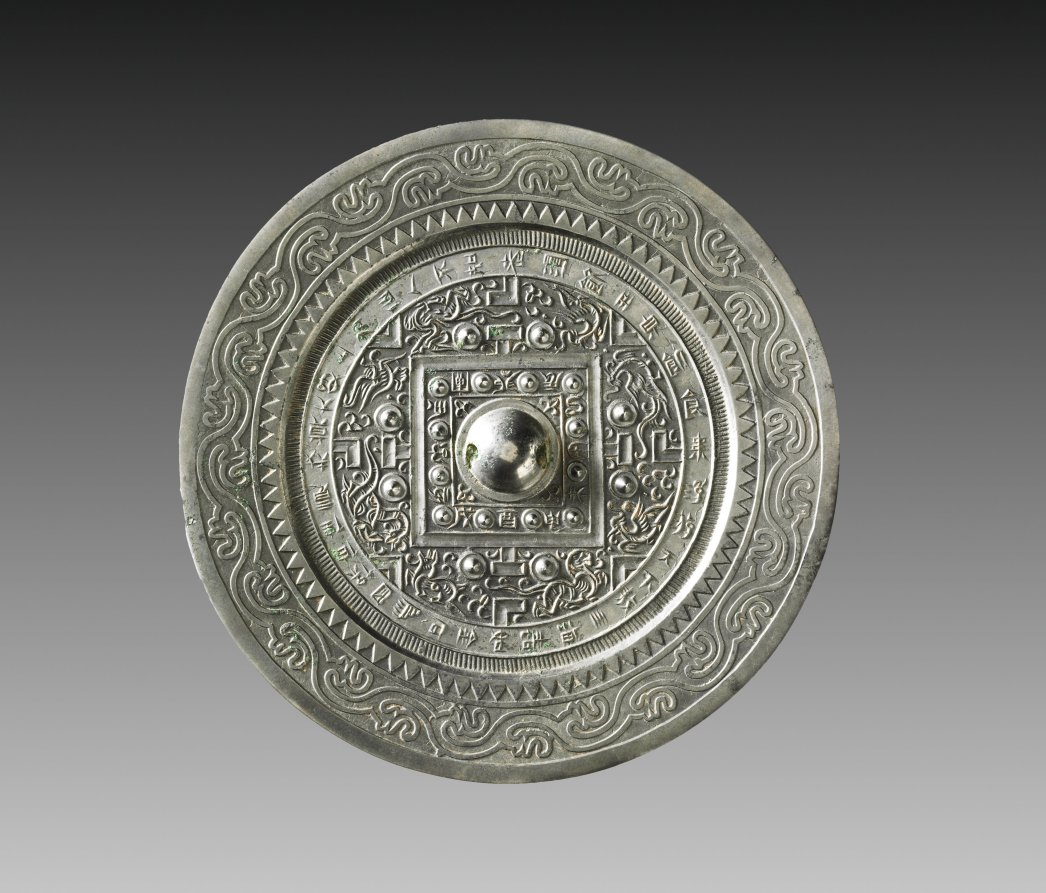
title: TLV Mirror with Multiple Nipples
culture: China, Xin dynasty (9–23 CE)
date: 9–23 CE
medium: bronze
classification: Metalwork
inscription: 作佳鏡哉真大好，上有仙人不知老。 渴飲玉泉飢食棗，浮遊天下傲四海。 壽如金石為國保。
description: The inscription in this mirror reads: A fine mirror it is, my making of it! I can show the ageless immortals up above. They wander over the earth and belittle the Four Oceans. They live as long as metal and stone, And are true protectors of our kingdom. These poetic lines suggest the reflective and magical qualities of the bronze mirror in the Chinese imagination. Besides reflecting the immortals, it illuminated the human soul so that it would be in tune with forces of yin and yang in Chinese cosmology.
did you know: This mirror includes a poetic inscription that credits the immortals as protectors of the kingdom.